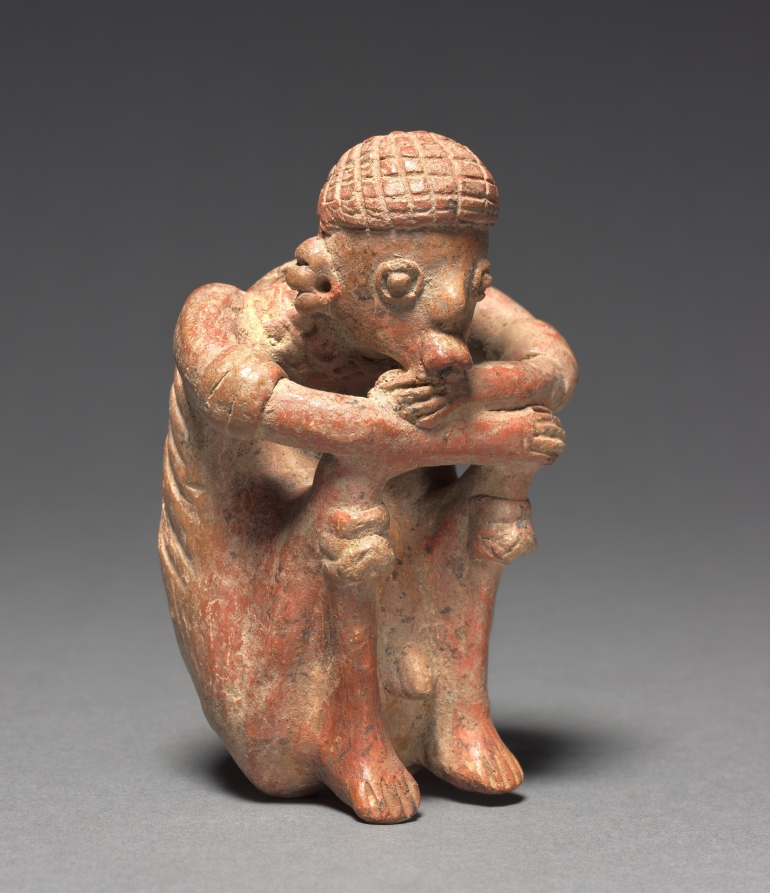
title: Emaciated Crouching Figure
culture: Mexico, Nayarit, San Sebastian Red Style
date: c. 100 BCE–300 CE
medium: earthenware with burnished red slip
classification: Sculpture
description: The protruding ribs and staring eyes of this melancholy figure may show the effects of a ritual fast, rather than famine. Fasting purified an individual in preparation for religious rites and may have enhanced the search for supernatural visions.